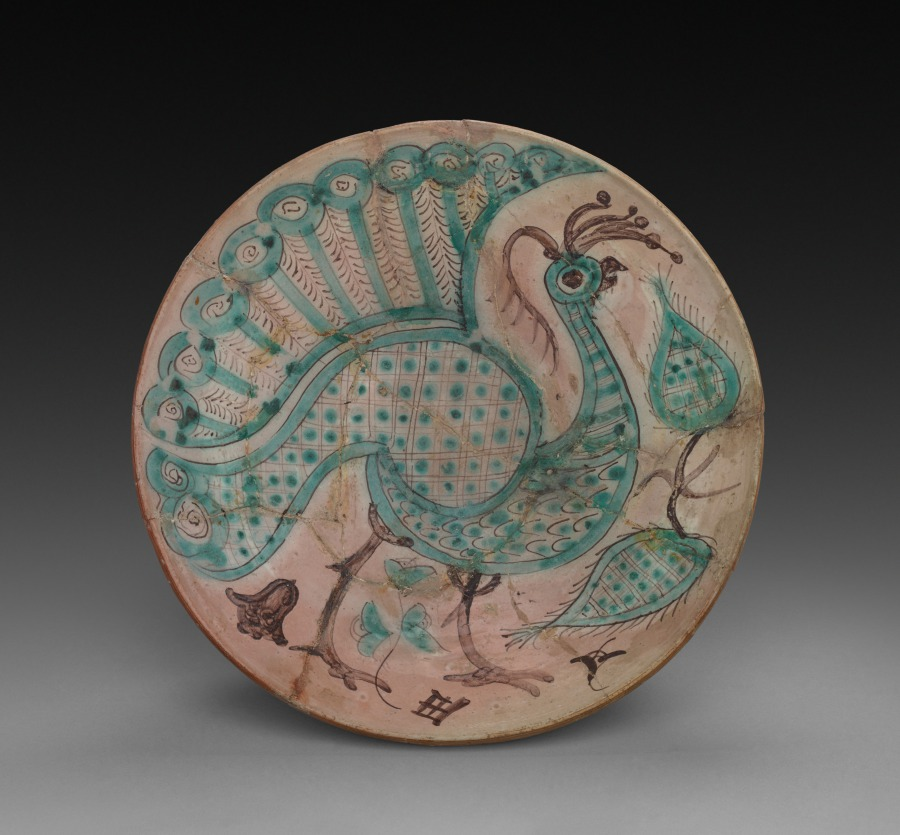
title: Bowl with Peacock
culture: Spain, Paterna, 14th century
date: 1300s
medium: tin-glazed earthenware (maiolica)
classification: Ceramic